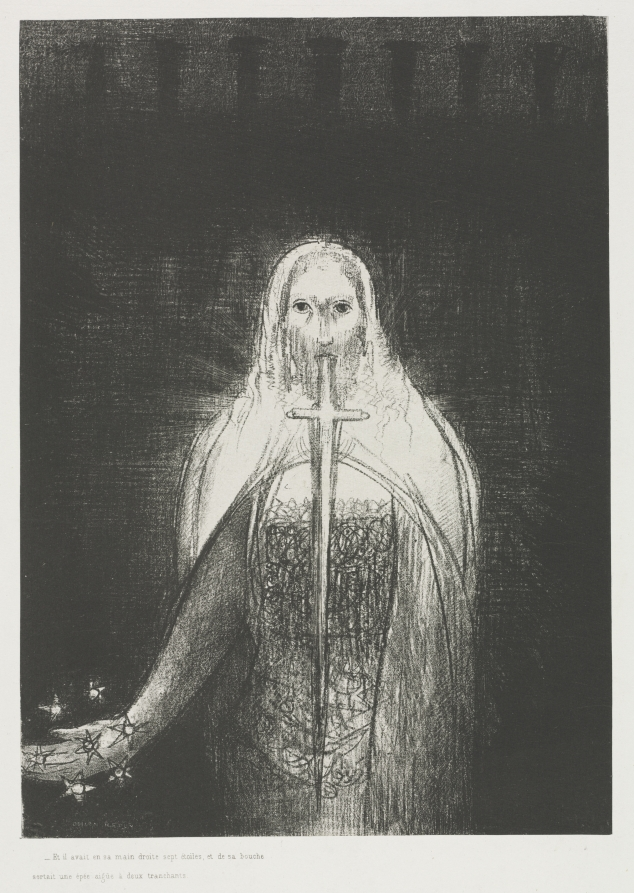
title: And He Had in His Right Hand Seven Stars; and Out of His Mouth Went a Sharp Two-Edged Sword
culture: France, late 19th Century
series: The Apocalypse of Saint John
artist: Odilon Redon (French, 1840–1916)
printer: Blanchard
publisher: Ambroise Vollard (French, 1867–1939)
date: 1899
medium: lithograph on China paper laid on wove paper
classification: Print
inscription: signed in stone, lower left: ODILON REDON; printed at lower left, below image: Et il avait en sa main droite sept étoiles, et de sa bouche / sortait une épée aiguë a deux tranchants.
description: The last of Odilon Redon’s 11 lithographic portfolios, this series relates to the Book of Revelation from the Christian Bible. The subject had been explored throughout art history, allowing the artist to align himself with past masters, such as Albrecht Dürer. Although Redon often vaguely referenced texts, these prints directly illustrate 12 individual passages, including one about a woman clothed with the sun and another focused on a great star falling from heaven. By the time he created this portfolio, Redon’s reputation was well established. The project was published by art dealer Ambroise Vollard, who began to sell and promote Redon’s work about a year earlier, building a market for his prints in Paris and abroad.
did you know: This is one of the last works where Redon experimented with lithograph and all-black medium. In contrast, bright, dazzling colors characterize his late works.